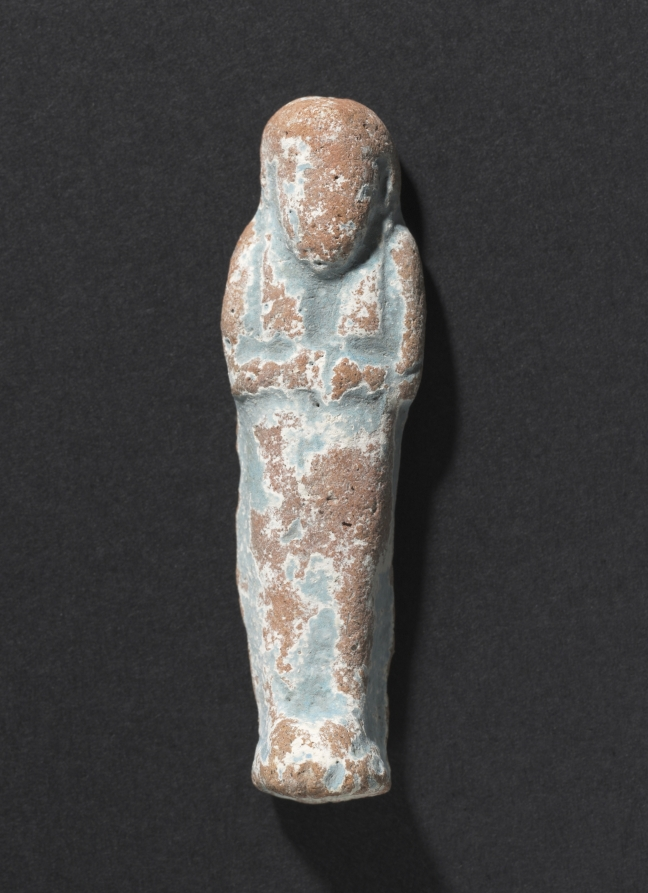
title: Shawabty of Ditamenpaankh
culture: Egypt, Late period (715–332 BCE), Dynasty 25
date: 715–656 BCE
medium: terracotta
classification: Funerary Equipment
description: High demand for shawabtys in the Late Period, a time when as many as 400 or more shawabtys were placed in the tomb with the deceased, gave rise to a specialized container for storing them: the shawabty box. This example is inscribed for the lady of the house, Ditamenpaankh, and was probably one of a pair originally made for her. The single-masted boat on the box's lid is perhaps an allusion to the pilgrimage of the deceased to the holy city of Abydos, the cult city of Osiris, king of the dead. The shawabtys inside are crude, mass-produced examples cast in an open mold. Made of terracotta, their blue paint imitates more costly shawabtys made of faience. As for the shawabty spell, it has been removed from its traditional location on the shawabty's front and relocated onto the sides of box, where it needed only to be written once, thus expediting production.